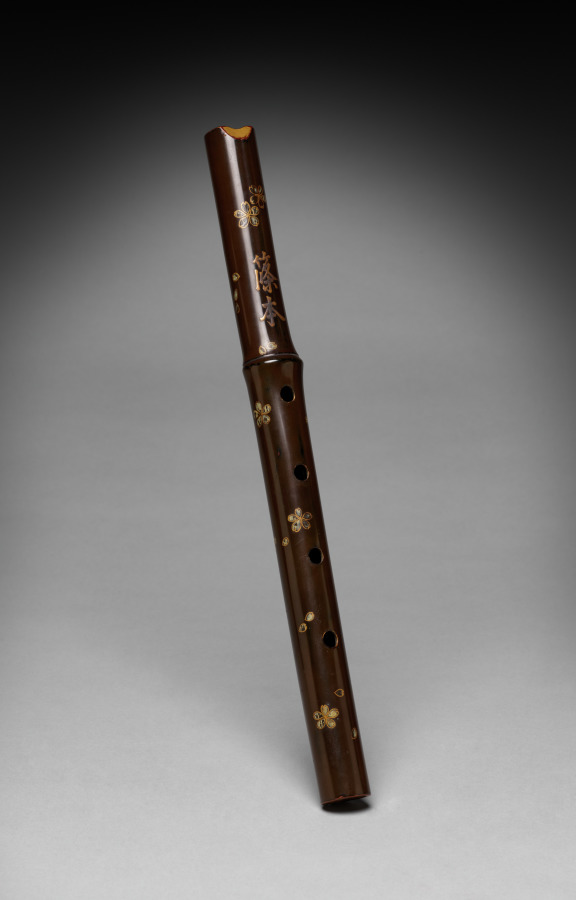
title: End-blown Flute (Hitoyogiri)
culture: Japan, Meiji period (1868–1912)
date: late 1800s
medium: Lacquered bamboo with gold and silver maki-e (sprinkled powder designs)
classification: Musical Instrument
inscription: 篠本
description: The hitoyogiri 一節切 is considered one type of shakuhachi 尺八 bamboo flute and was popular in the 16th and 17th centuries. It is smaller and of weaker sound than the better known fuke 普化, and was thus known as a "small bamboo" or kotake 小竹, during a brief 19th-century revival. The node of the bamboo is positioned between the four finger holes on the front, and the thumb hole at the top of the back. This one has a design of cherry blossoms and scattered petals.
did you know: The name of this flute, hitoyogiri 一節切 comes from the fact that it has a single node in the bamboo from which it is made.